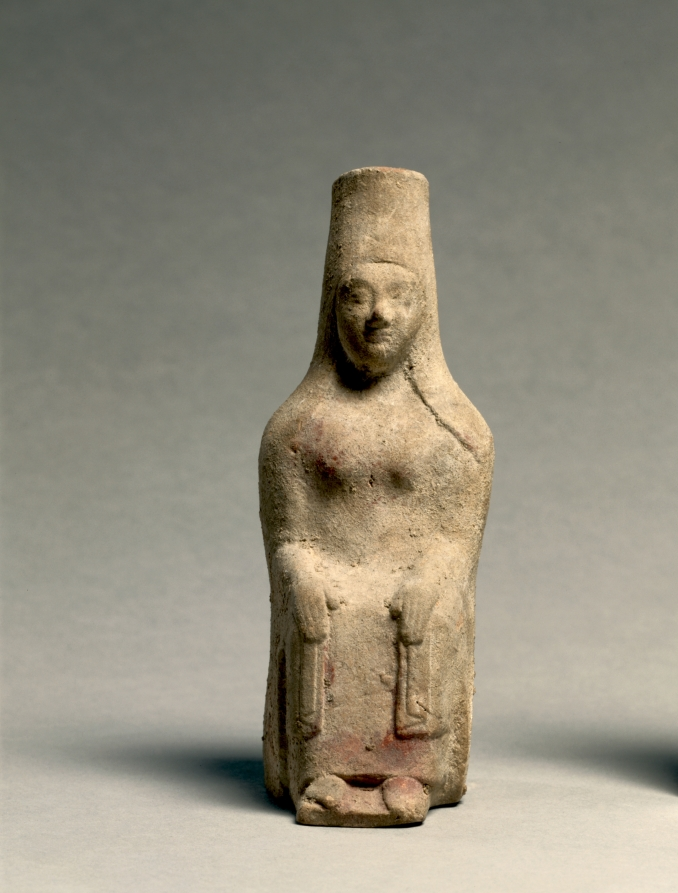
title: Seated Goddess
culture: Greece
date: 500s BCE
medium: terracotta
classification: Sculpture